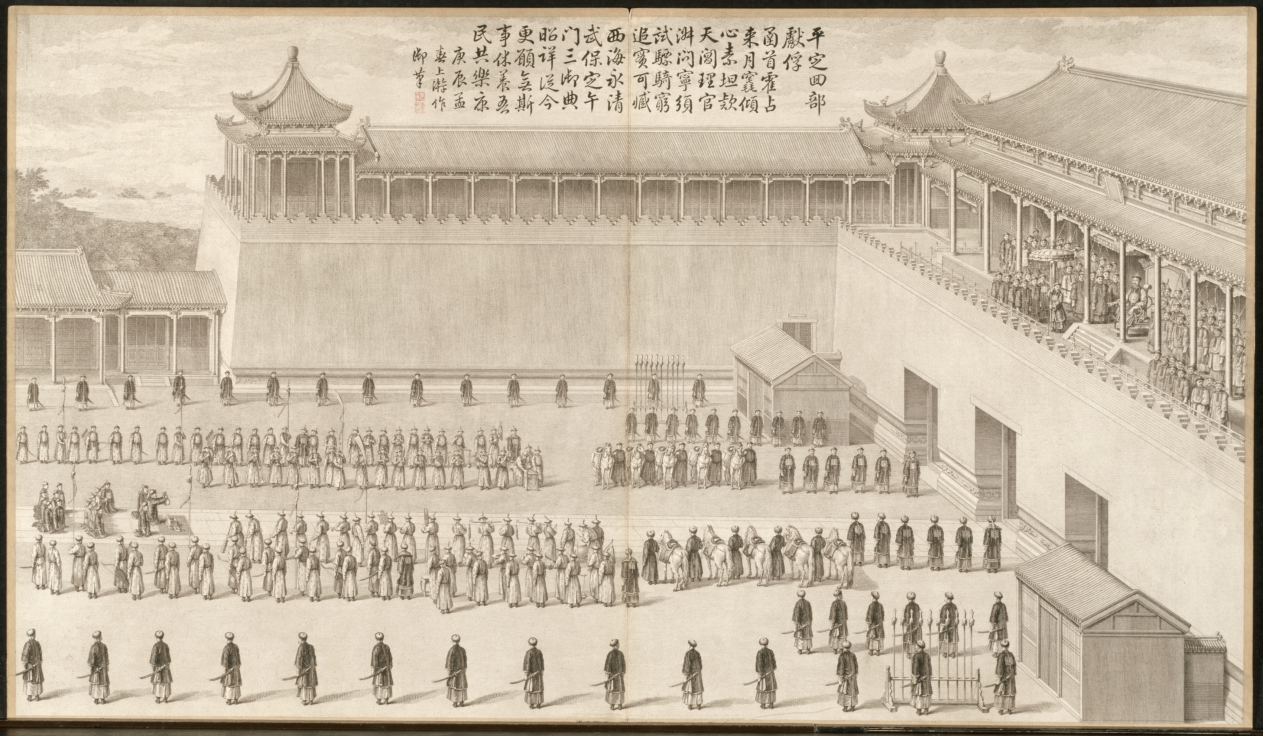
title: The Presentation of Uigur Captives: from Battle Scenes of the Quelling of Rebellions in the Western Regions, with Imperial Poems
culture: China, Qing dynasty (1644–1911), Qianlong reign (1736–95)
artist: Jean Denis Attiret (French, 1702–1768)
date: c. 1765–74; poem dated 1760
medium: etching, mounted in album form, 16 leaves plus two additional leaves of inscriptions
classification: Print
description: This set of etchings was commissioned by Emperor Qianlong to record in pictorial terms the courage of his generals and soldiers in quelling the rebellions in the Western Regions. Qianlong added his own poem to each of the etchings, indicating his appreciation and pride in this demonstration of military might. "Western Regions" refers to the present-day Xingjiang province, often described in Western writing as "Central Asia."